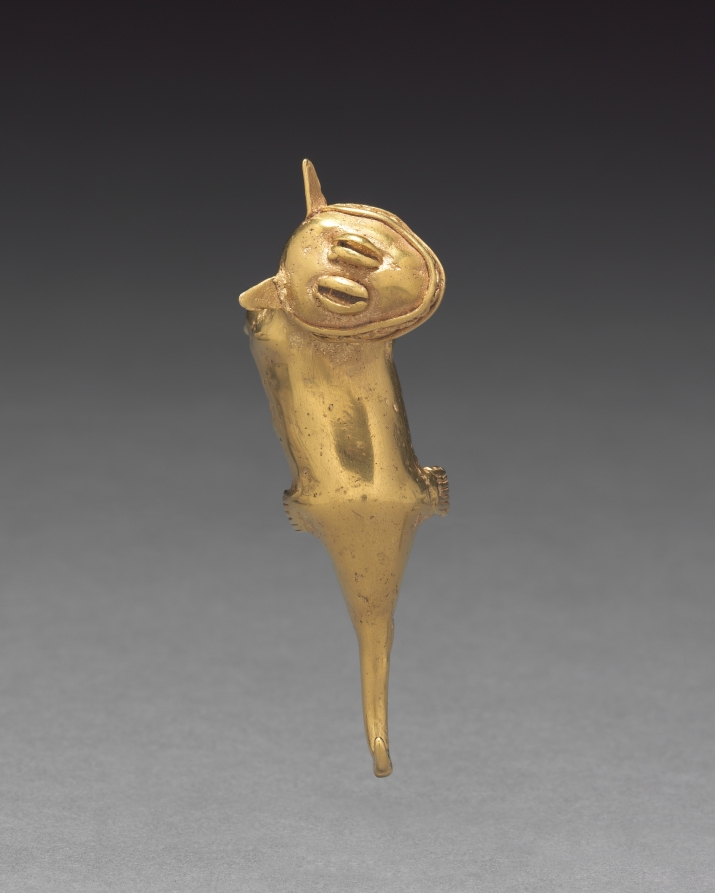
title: Jaguar Pendant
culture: Panama, Veraguas style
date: 800–1500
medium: cast gold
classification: Metalwork